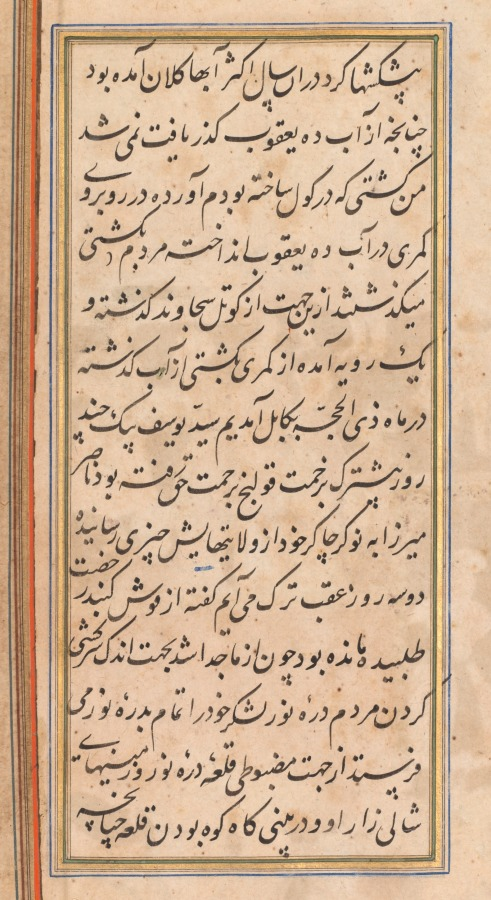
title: A feast for Babur hosted by his half-brother Jahangir Mirza in Ghazni in May 1505, from a Babur-nama (Memoirs of Babur)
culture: India, Mughal, 16th century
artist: Basavana (Indian, active c. 1560–1600)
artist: and Madhav Khurd (Indian, active late 1500s)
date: c. 1589; outer margins added c. mid-1900s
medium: Gum tempera and gold on paper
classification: Painting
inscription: verso: Persian text, in nasta‘liq script: . . . presented many gifts. In that year most of the rivers had become very swollen, to the extent that the Dih-i Ya‘qub River could not be forded. I brought the boat I had made at the lake and floated it in the waters of Dih-i Ya‘qub opposite Kamri and all the people crossed by boat. For this reason we went through the Sajavand pass and straight through crossing the river at Kamri by boat. We arrived at Kabul in the month of Dh’ul-Hijja [May 1505]. A few days earlier, Sayyid Yusuf Beyg had died of colic. At Kush Gunbad, Nasir Mirza had requested leave and remained behind to get provisions for his retinue from his own domain, saying he would follow in two or three days. Once he had left us he sent his entire army to the Nur valley on account of a minor act of disobedience by the people of the Nur valley. [Given] its rice fields and the location of its citadel on the peak of the mountain as . . .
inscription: recto: Persian inscription in bottom margin, in nasta‘liq script: the work of Basavana / [ . . . ] / Madhav Khurd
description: Twenty-one years before his conquest of Delhi, Babur took control of territories in Afghanistan, including the cities of Kabul and Ghazni. His half-brother, who controlled the region around Ghazni, ordered that a party be thrown in honor of Babur’s arrival from the north. Drinking parties and feasts in lavish movable tent settings, where gifts were exchanged, alliances forged, and relationships cemented, were as important to the building of the empire as the battles.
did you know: A manager directs servers to bring spoons and lay out the buffet table.